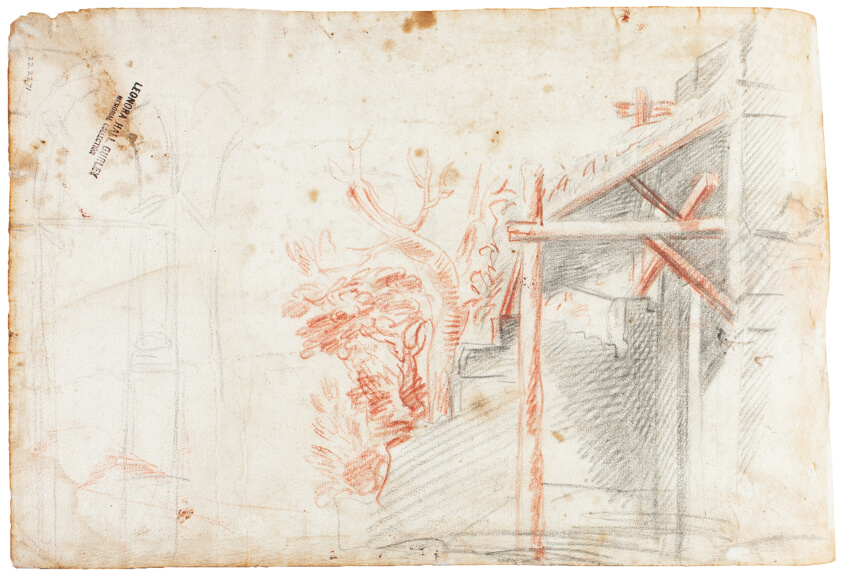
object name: Drawing and Watercolor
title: Standing Magus (recto); Sketch of Stable and Trees (verso)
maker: Peditrobably Domenico Fiasella (Italian, 1580-1669); or possibly Lodovico Carracci (Italian, 1555-1619); or possibly the circle of Matteo Rosselli (Italian, 1578-1650)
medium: Black chalk (recto), and red and black chalk (verso), on cream laid paper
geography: Italy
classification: drawings (visual works); prints and drawing